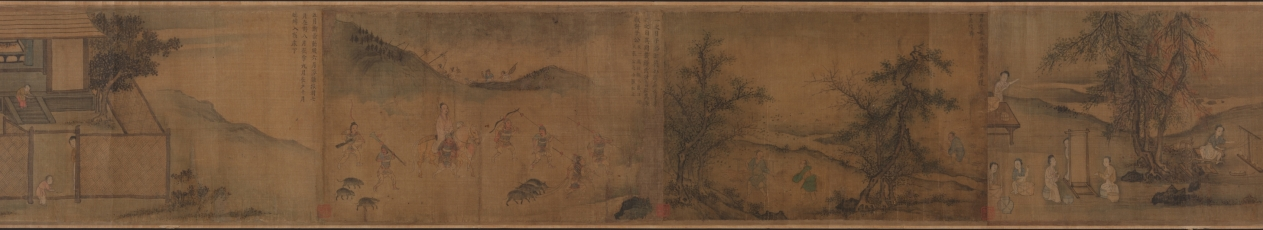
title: "Seventh Month" from the Odes of Bin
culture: China, Southern Song dynasty (1127-1279)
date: 1200s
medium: Handscroll; ink and color on silk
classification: Painting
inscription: Colophons: 1. [on the frontispiece] by the Qianlong emperor (dated 1741). 2. by Lu Wan (dated Zhengde dingchou, 1517). 2. by the Jiaqing emperor (dated 1807).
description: According to Confucian thought, the ruler looks after the well-being of his people which involves agricultural activities. Seventh Month from the ancient Odes of Bin in the Shijing (Book of Poetry) describes occupations throughout the year, including plowing, harvesting, hunting, making clothes, and observing rituals. The earliest illustrations of these Odes accompanied by text were commissioned by Southern Song emperor Gaozong (reigned 1127–1162). As the lower Yangzi delta had become the new seat of government, Gaozong had sets of these illustrations produced by court artists to revive the dynasty and convince the Confucian officialelite of his legitimacy to rule.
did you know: The Odes of Bin appears in the classic Shijing (Book of Poetry), an anthology of more than 300 poems, folk songs, and ceremonial hymns that were originally chanted to music.